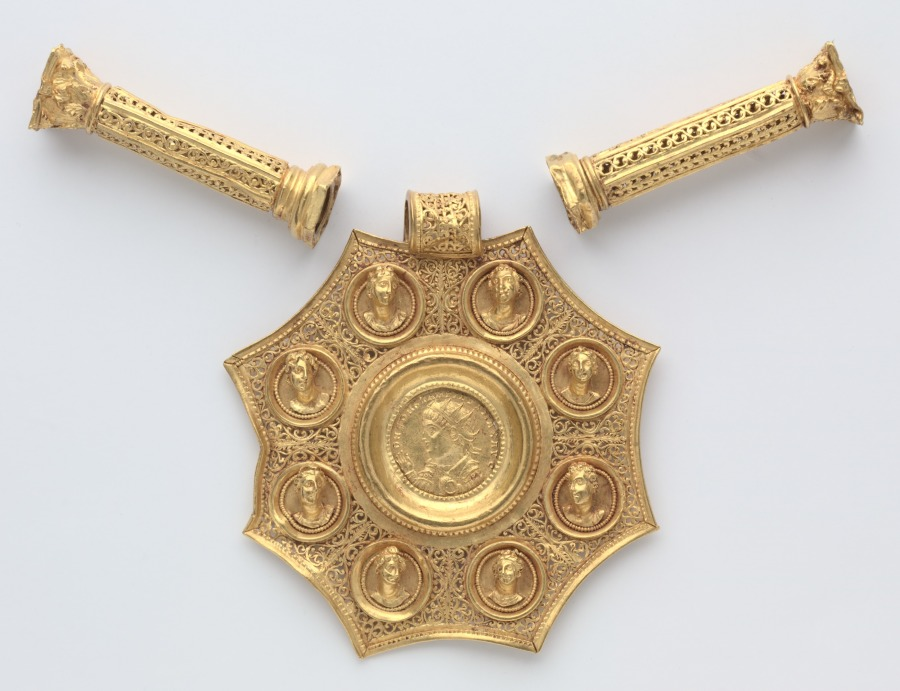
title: Octagonal Pendant with Corinthian Column Spacers and Clasp Set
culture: Byzantium, Late Roman, Eastern Mediterranean, (probably Sirium or Nicomedia), Byzantine period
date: 324–26 CE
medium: gold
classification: Jewelry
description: Mounted at the center of this octagonal pendant is a rare coin issued by Constantine the Great, the Roman Empire’s first Christian emperor. Constantine’s portrait appears on the coin’s front, those of two of his sons on the back. Constantine’s image is surrounded by male and female busts, some of which are mythological figures. The pendant once formed the centerpiece of a sumptuous gold necklace, likely a gift for a high-ranking court official or member of the imperial family. This larger necklace is thought to have included four additional coin-set pendants—two hexagonal and two circular, now in Washington, DC (Dumbarton Oaks), London (British Museum), and Paris (Musée du Louvre).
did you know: Using the opus interrasile openwork technique, a goldsmith delicately punched and filed hundreds of tiny holes to create the intricate filigree pattern on this pendant.